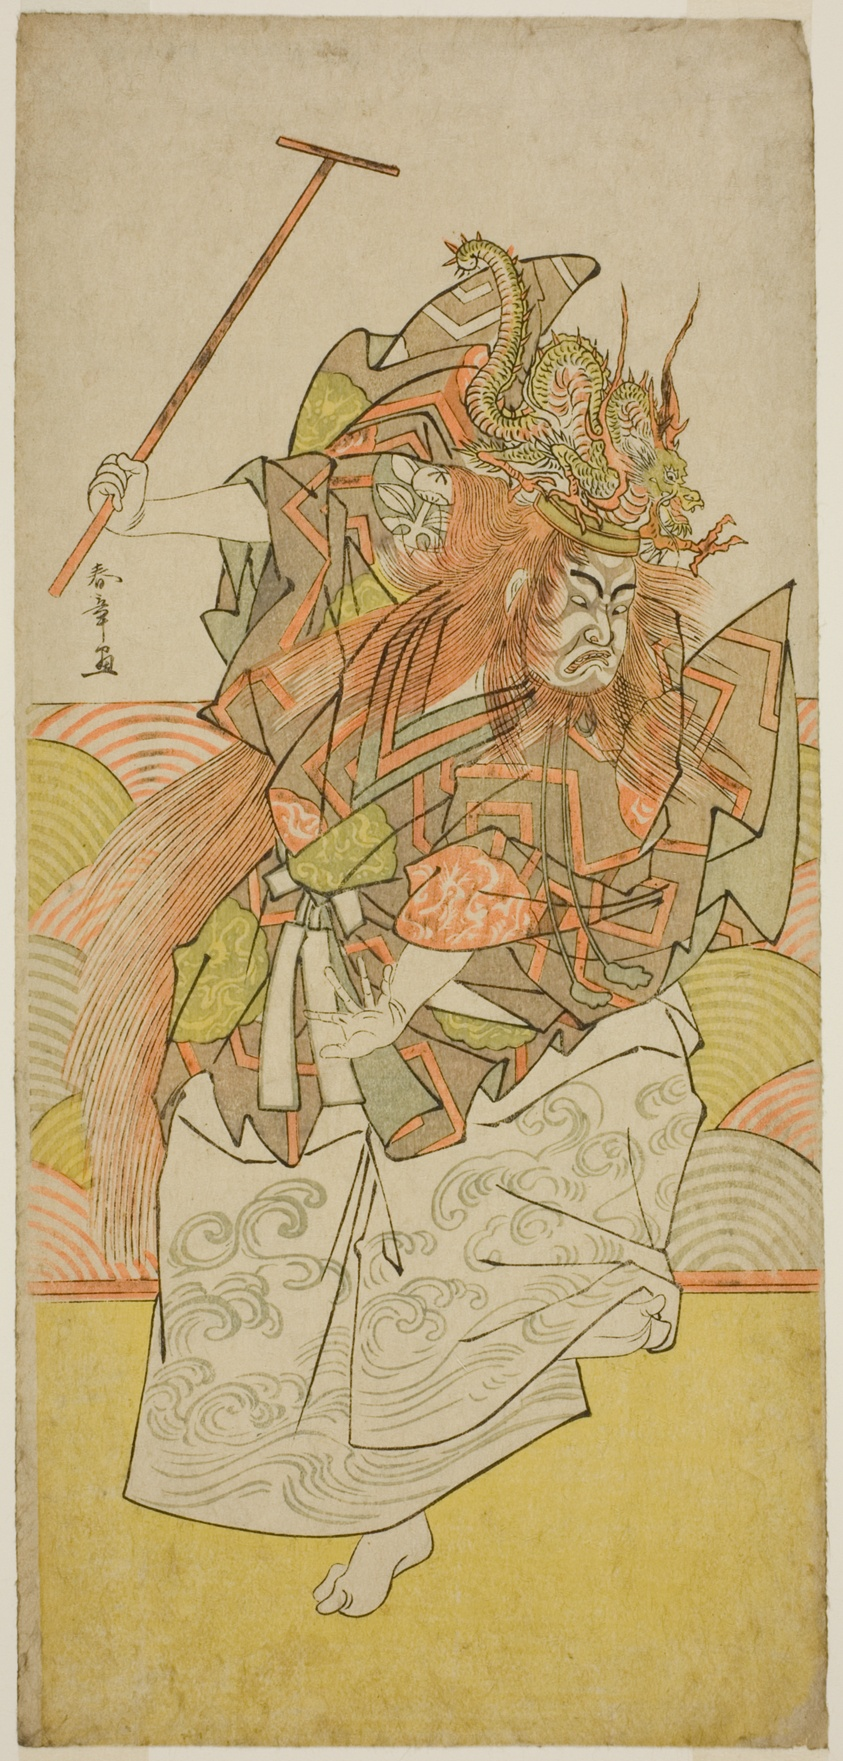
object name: Print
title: The Actor Ichimura Uzaemon IX as an Incarnation of the Dragon King in the Play Saki Masuya Ume on Kachidoki, Performed at the Ichimura Theater in te Eleventh Month, 1778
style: Japanese (culture or style)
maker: Katsukawa Shunsho 勝川 春章; Japanese, 1726-1792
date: c. 1778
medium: Color woodblock print; hosoban; from a multisheet composition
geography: Japan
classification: woodblock print; print; asian art